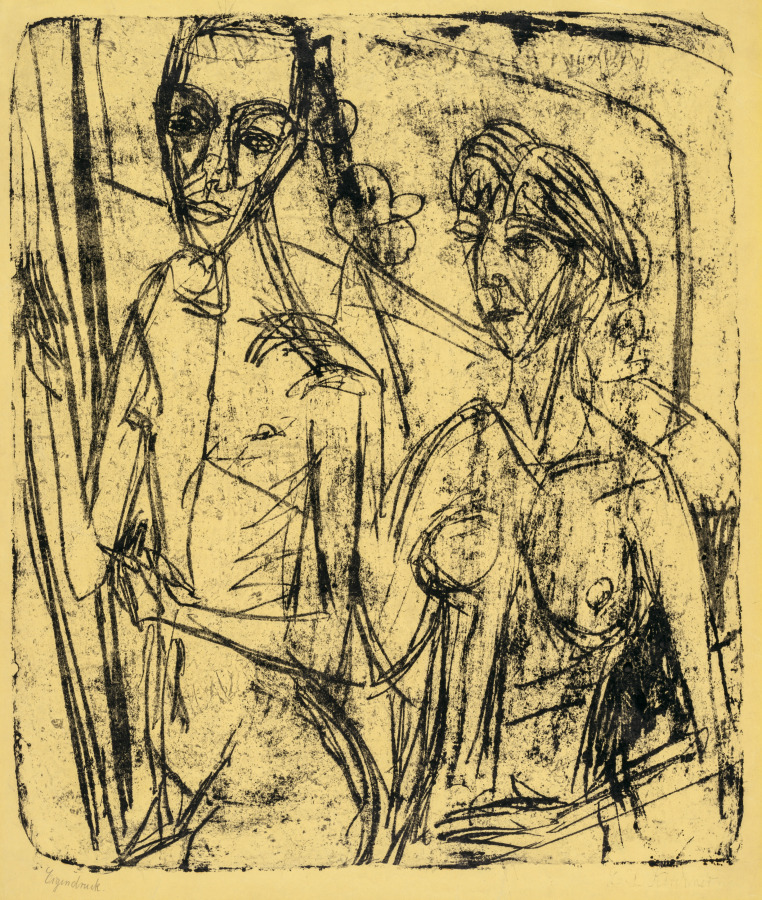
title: Couple in Room, Nude Man with Woman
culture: Germany, 20th century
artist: Ernst Ludwig Kirchner (German, 1880–1938)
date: 1915–16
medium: Lithograph on yellow paper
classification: Print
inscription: in pencil: Eigendruck, E. L. Kirchner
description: The man in this image resembles one of Ernst Ludwig Kirchner’s close friends, Hugo Biallowons, who was killed in World War I shortly after this print was made. Kirchner depicted the man in a cramped space next to a nude woman who reaches for him without making eye contact. The yellow paper suggests artificial light. Kirchner owned one large lithographic stone, from which he made one lithograph after another simply by sanding down the stone, and then starting again with a new composition. This resulted in very small editions. By spreading water mixed with turpentine over the surface of the stone to loosen the lithographic crayon, he created unexpected and spontaneous results, seen here in the grainy and broken lines.